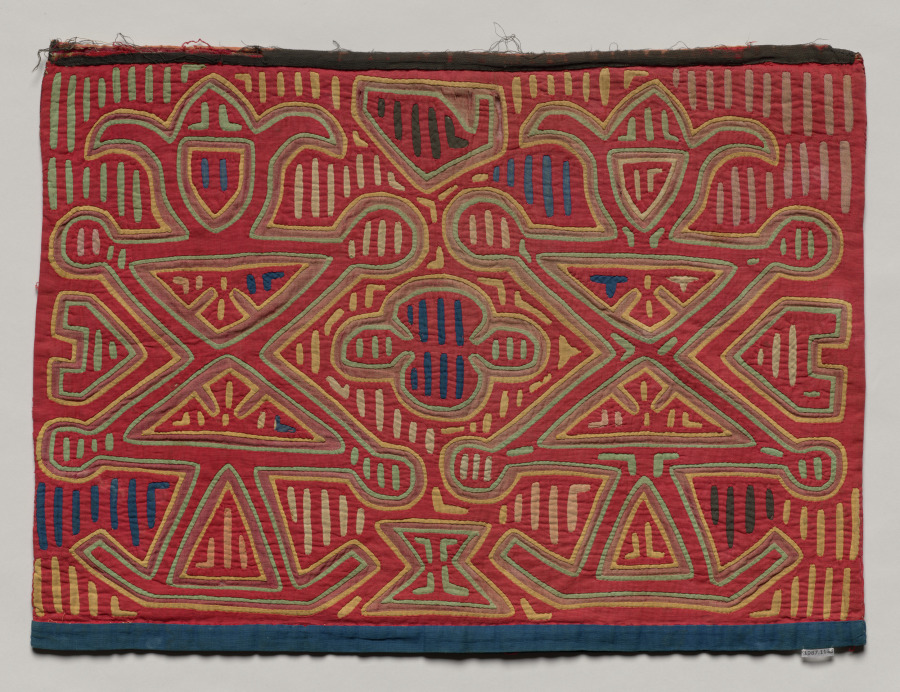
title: Mola Panel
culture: Republic of Panamá, Gunayala Comarca, Guna people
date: 1900s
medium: cotton, reverse appliqué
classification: Textile